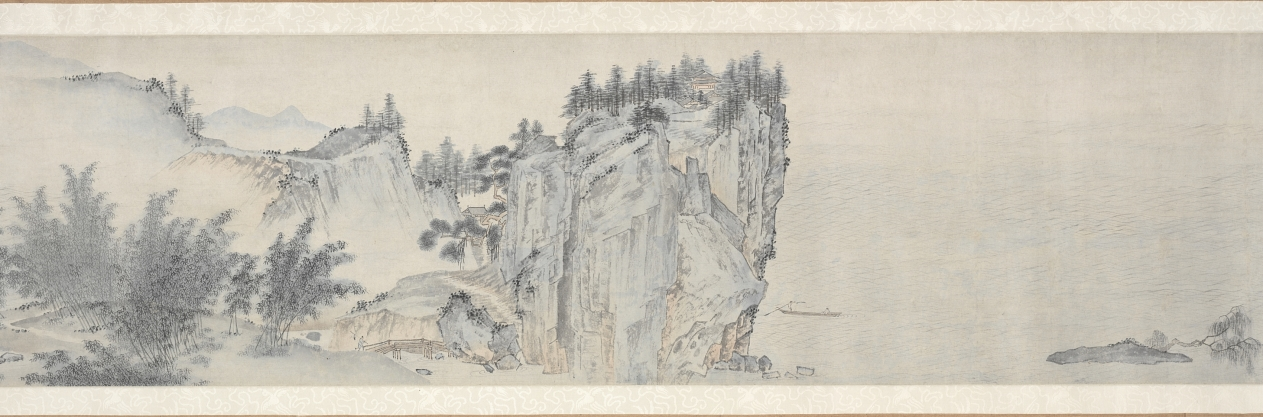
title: Ten Thousand Li of the Yangzi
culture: China, Ming dynasty (1368–1644)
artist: Dai Jin (Chinese, 1388–1462)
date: c. 1400s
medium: Handscroll; ink and color on paper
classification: Painting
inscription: Two colophons at end. Artist's seals: Dai Jin 戴進 and Wenjin 文進.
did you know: Dai Jin is traditionally considered the founder of the Zhe School, a style of landscape painting.